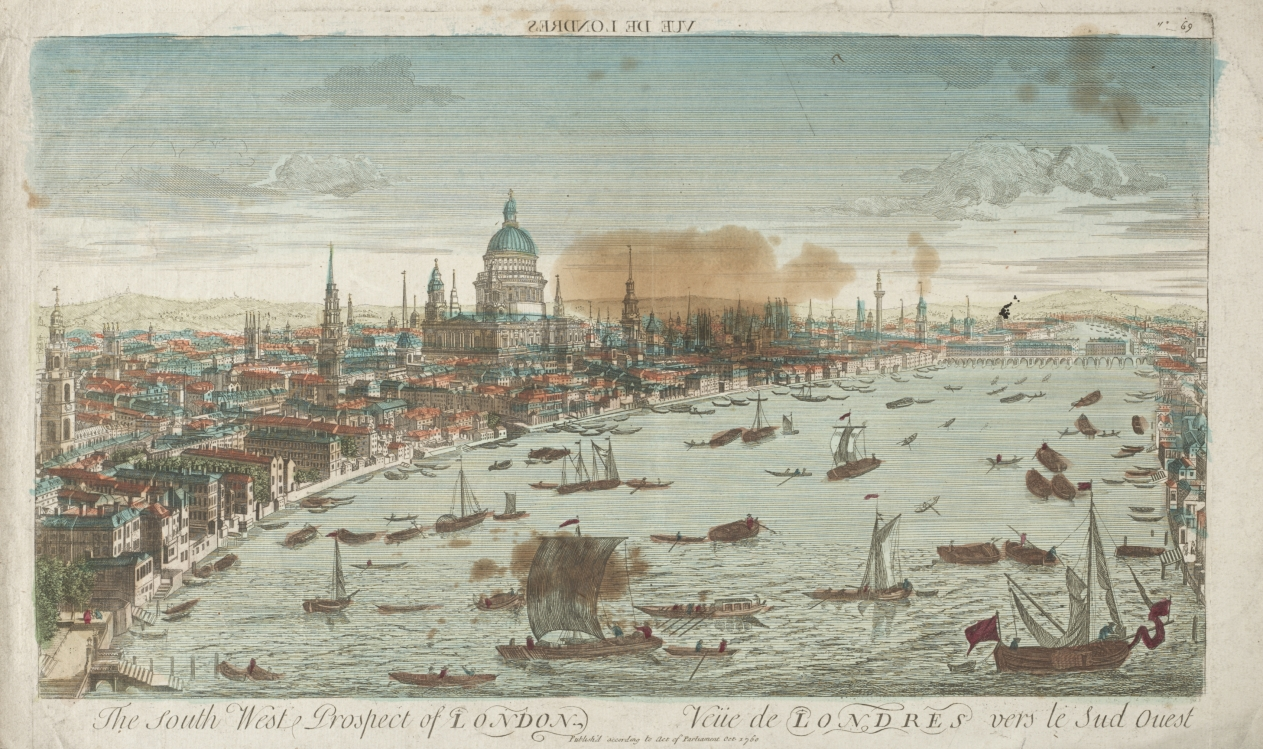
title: Southwest Prospect of London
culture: England, 18th century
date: 1760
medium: hand-colored engraving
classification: Print